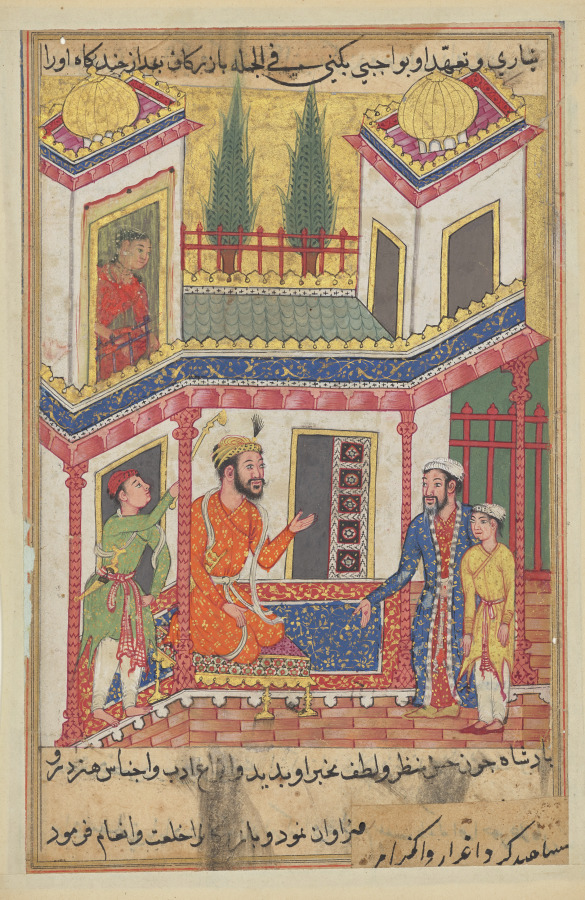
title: The merchant returns bringing a young slave who is really the son of the princess of Rum, now married to the king, from a Tuti-nama (Tales of a Parrot): Fiftieth Night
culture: Mughal India, court of Akbar (reigned 1556–1605)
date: c. 1560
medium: gum tempera, ink, and gold on paper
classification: Painting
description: The princess of Rum watches anxiously from an upper window as her son is introduced to the enthroned king. In order to hide his identity, she has told her husband that the young man has expert knowledge of precious gemstones. The king, impressed with the slave’s skill, welcomes him into his court.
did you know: The artist neglected to paint the white hairs of the fly whisk above the head of the king.